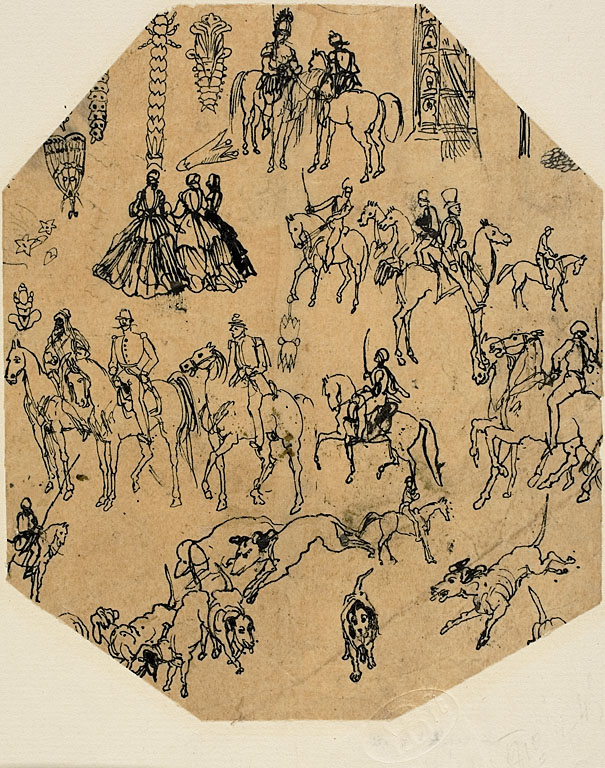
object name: Drawing and Watercolor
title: Sheet of Sketches: Hounds, Riders, Ladies. Architectural Elements, Insects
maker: Rodolphe Bresdin (French, 1825-1885)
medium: Pen and black ink, on tan tracing paper, laid down on ivory laid paper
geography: France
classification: pen and ink drawings; drawings (visual works); prints and drawing